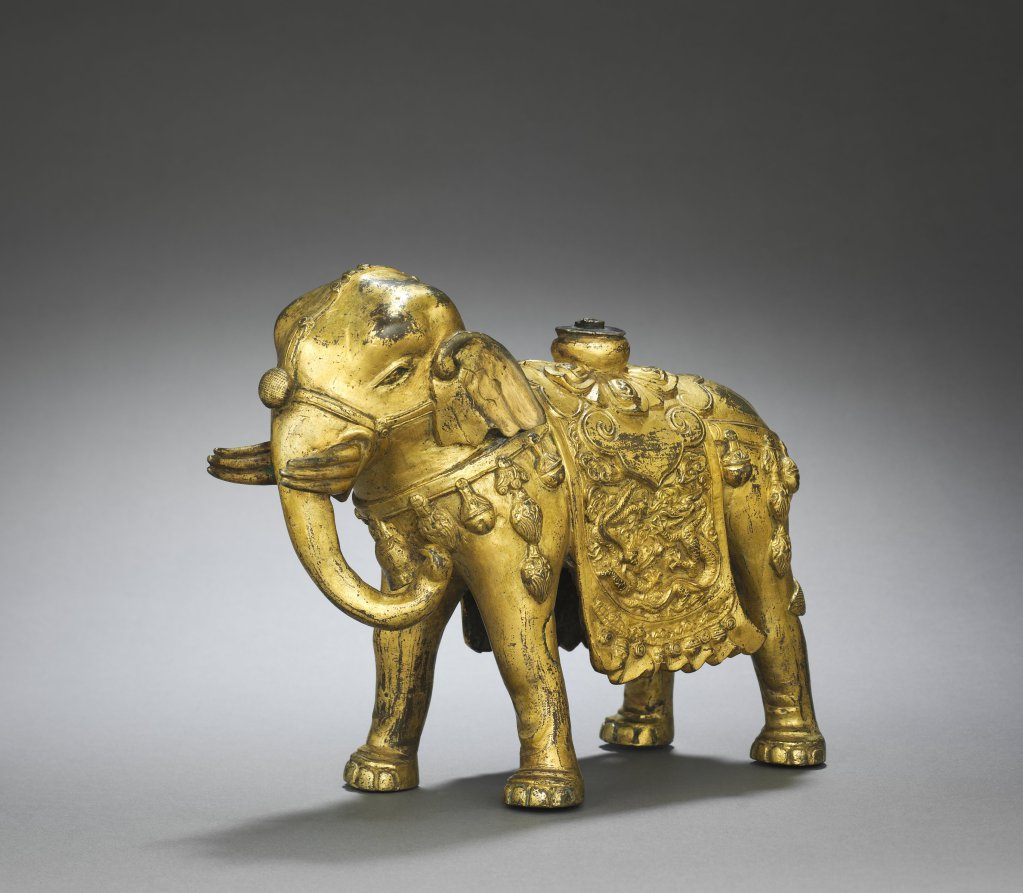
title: Caparisoned Elephant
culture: China, Liao dynasty (916-1125)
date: c. 1000s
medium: gilt bronze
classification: Sculpture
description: The six-tusked elephant holds the throne of Puxian (Samantabhadra), the Bodhisattva of Universal Virtue, who often appears with Wenshu (Manjusri), the Bodhisattva of Wisdom, on his lion-vehicle. This impressive gilt bronze statue is solidly cast, except for the hollow at the center of its belly. The richly ornate saddle cloth exhibits superb craftsmanship and vivid representations of dragons among clouds, echoing the worldly splendor of the Liao material culture.